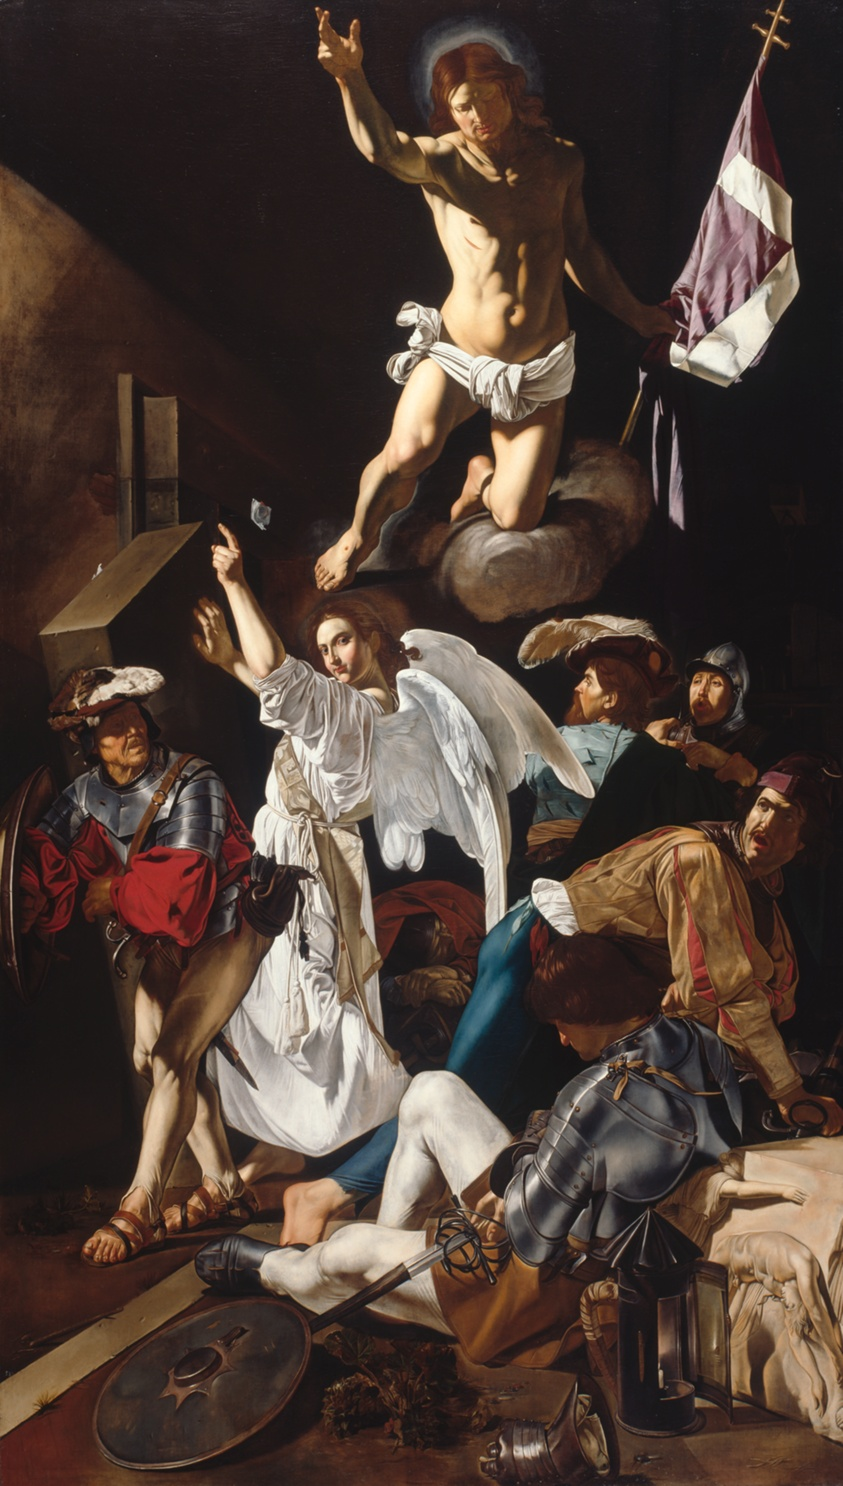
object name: Painting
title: The Resurrection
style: 17th Century, Baroque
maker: Cecco del Caravaggio (Francesco Boneri; Italian, 1588/90–after 1620)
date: c. 1619-20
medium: Oil on canvas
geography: Italy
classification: oil on canvas; Italian; oil paintings (visual works); paint; painting; european painting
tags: resurrection scenes, lantern, clouds, armor, sleep, shields, swords, flags, angels, soldiers, biblical, religious, religion, Christianity, Christian subjects